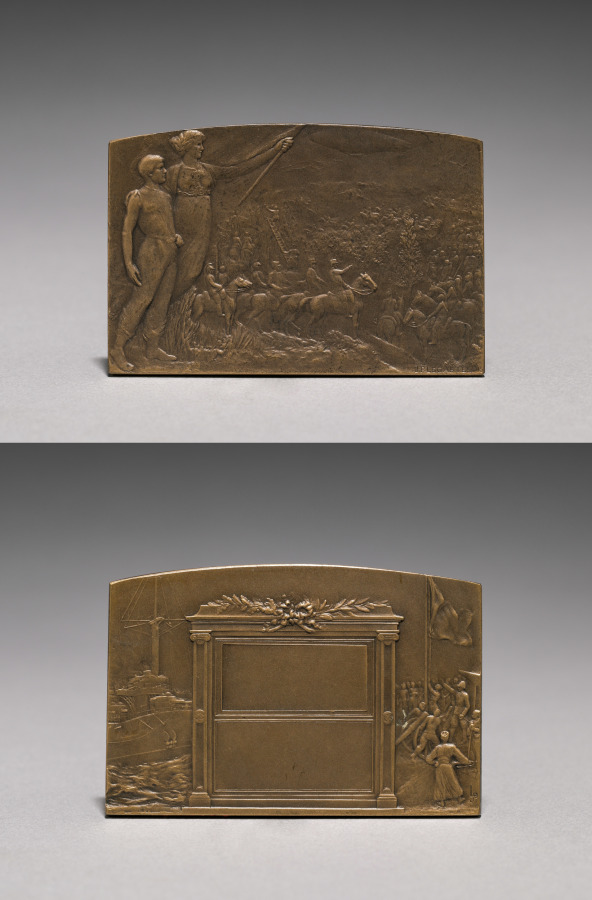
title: Medal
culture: France, 19th century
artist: Jules Prosper Legastelois (French, 1855–1931)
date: c. 1914–18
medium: bronze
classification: Metalwork